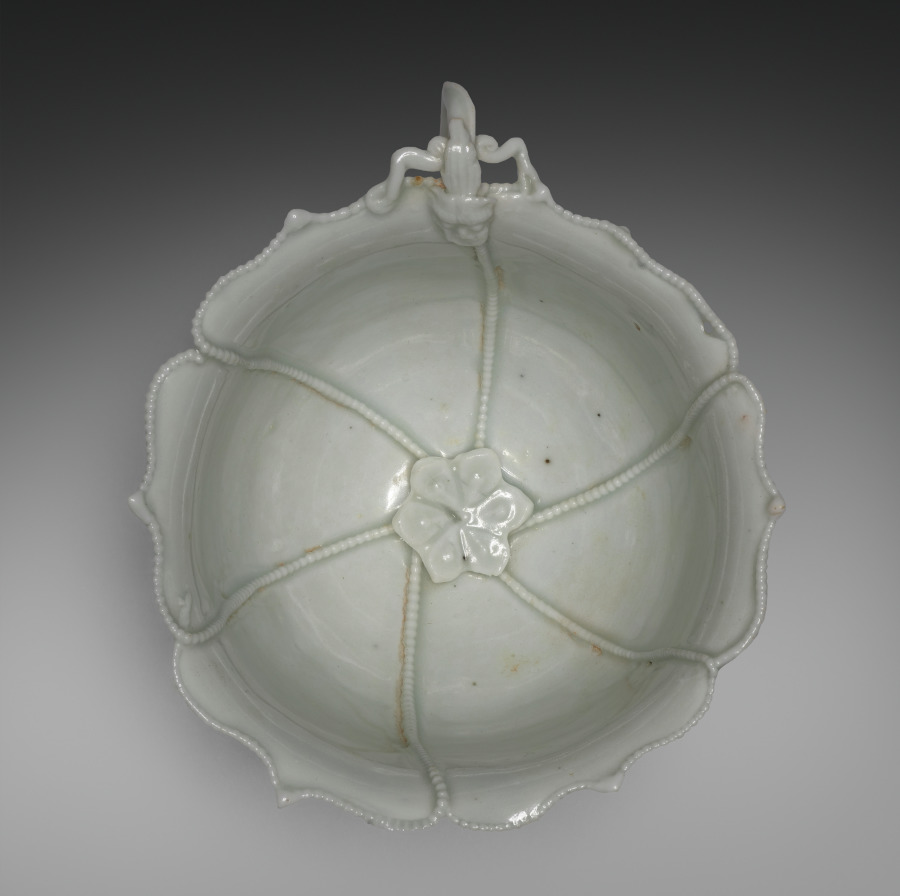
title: Fluted Cup with Dragon Handle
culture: China, Jiangxi Province, Jingdezhen kilns, Yuan dynasty (1271–1368)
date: early 1300s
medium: Glazed porcelain, Qingbai (bluish-white) ware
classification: Ceramic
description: Very thinly potted, the subtly lobed body of this cup is almost translucent. The thin, slightly opaque, light greenish glaze lends a sugary shine. Applied elements, including the handle, beaded borders, and sculptural floret, are constructed and glazed with the same materials as the body, providing a seamless blend of form and decorative embellishment. The result is an evocative reminder of slightly earlier silver cups, also created in the form of flowers. This pristine, natural construction is challenged, however, by the archaic dragon that acts as the handle. Borrowed from the decoration found on much earlier bronzes, this added form illustrates the eclecticism of the Yuan, the attempt to blend present vision with interest in the past.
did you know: Clay beading divides the cup's interior into six foliate panels with a six-petaled flower at the junction of the beaded lines.